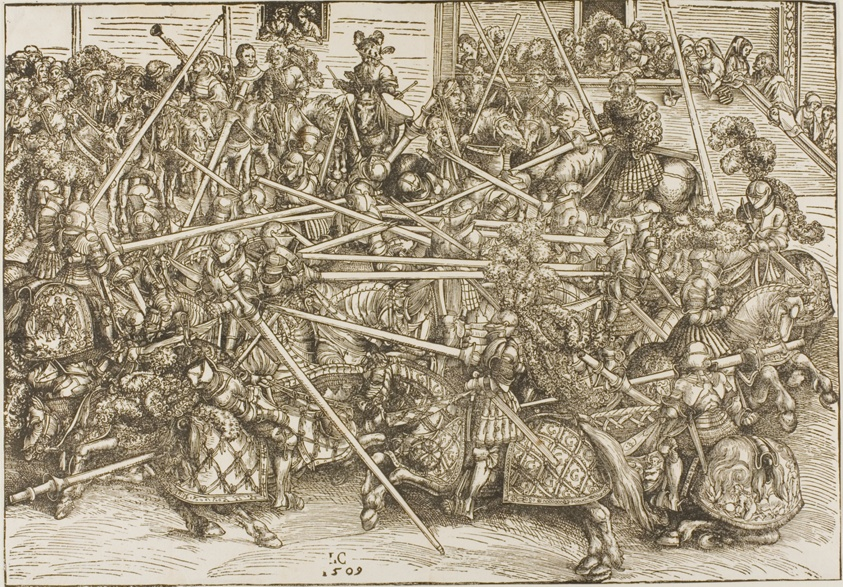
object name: Print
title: The Third Tournament, with Knights Breaking Lances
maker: Lucas Cranach the Elder (German, 1472-1553)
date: 1509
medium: Woodcut in black on ivory laid paper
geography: Germany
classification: woodcut; print; prints and drawing